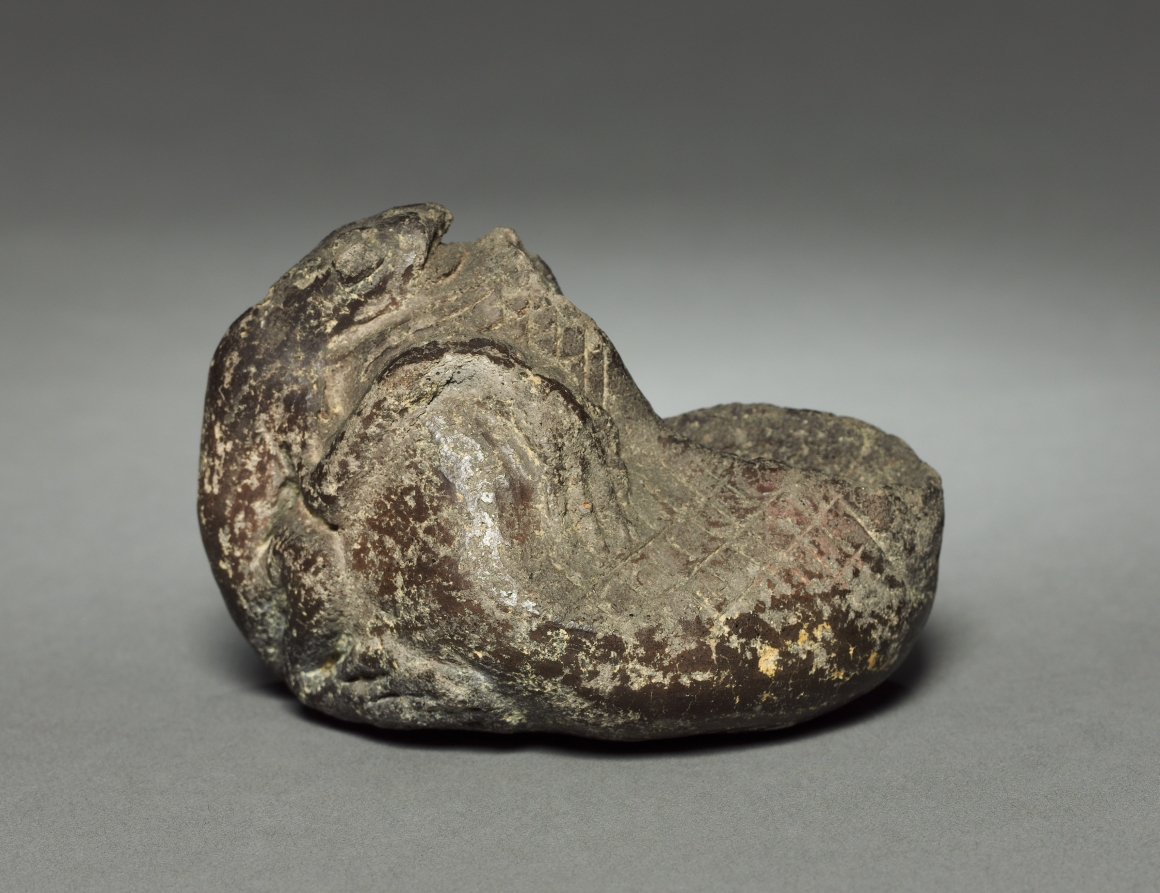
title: Dish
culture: Colombia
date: before 1921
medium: pottery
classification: Ceramic